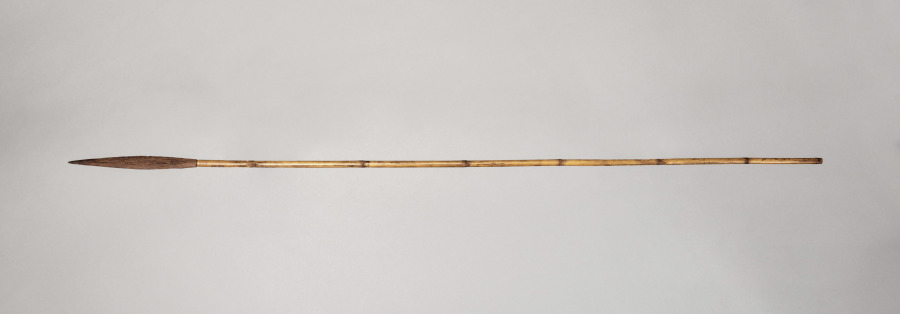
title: Arrow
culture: Philippines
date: before 1922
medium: reed shaft with metal tip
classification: Arms and Armor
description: This straight, lightweight arrow shaft is made from a single length of bamboo. Its surface is smooth and undecorated, with slight natural tapering toward the point. Shallow notches are cut at the rear end for attaching the bowstring.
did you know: The Aeta people typically used arrows like this one for hunting small game and birds.